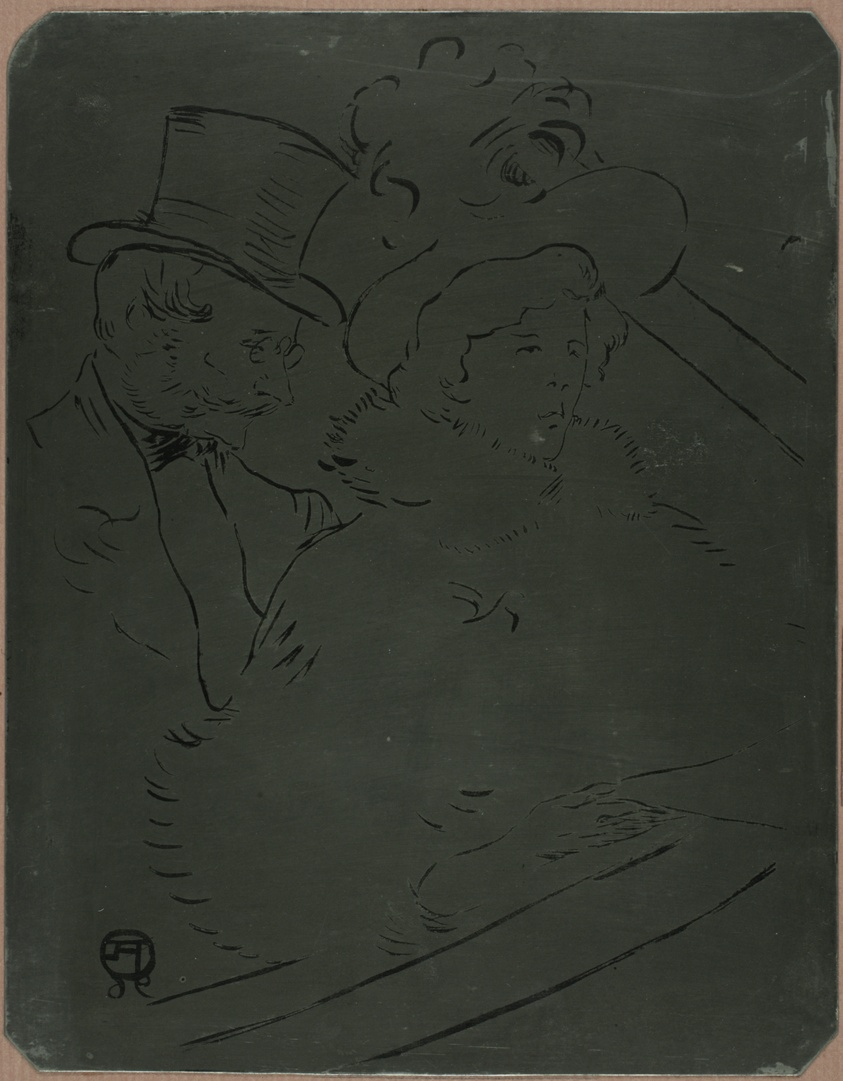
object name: Print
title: At the Concert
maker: Henri de Toulouse-Lautrec (French, 1864-1901)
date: 1896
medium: Zinc lithographic plate with corners removed and beveled edges, laid down on mauve board and taped to mat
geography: France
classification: zincograph; matrix; prints and drawing; print